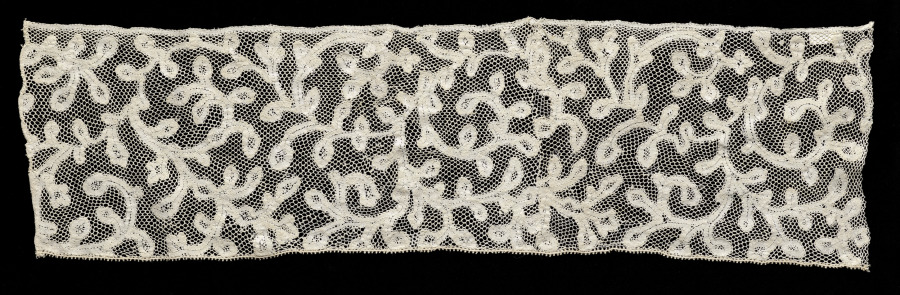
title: Lace Edging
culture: Italy, Milan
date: 1700s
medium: Linen: bobbin lace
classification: Lace